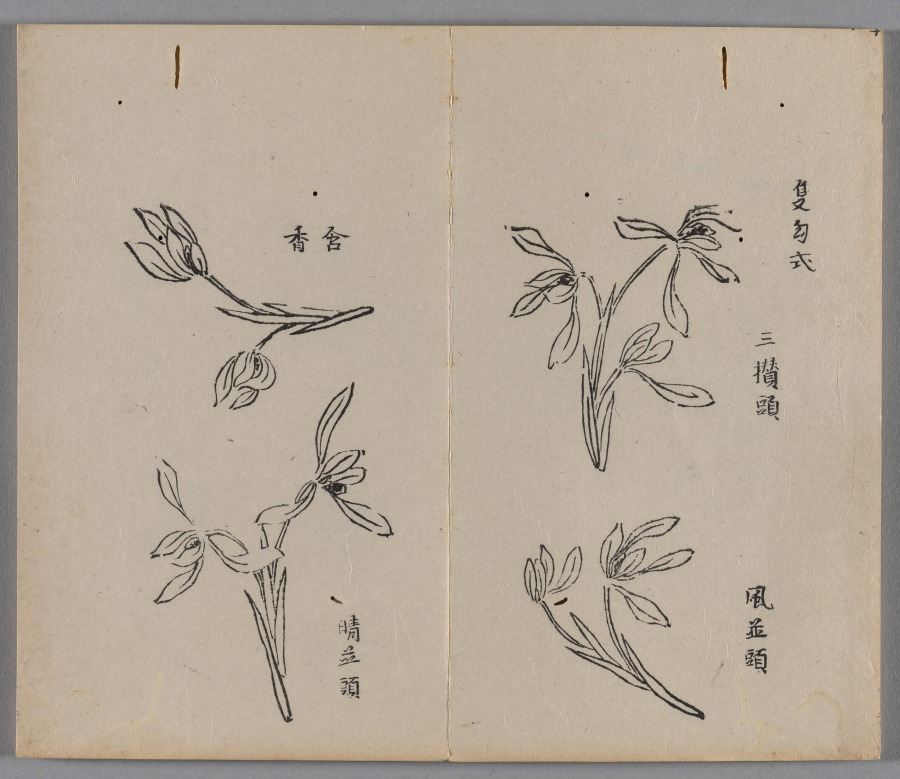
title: Ten Bamboo Studio Painting and Calligraphy Handbook (Shizhuzhai shuhua pu): Orchids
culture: China, Qing dynasty (1644-1911)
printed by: Hu Zhengyan (Chinese, c. 1584–1674)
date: 1633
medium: Woodblock-printed book; ink and colors on paper; first edition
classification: Print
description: Color printing reached a level of perfection in the early 1600s, as seen in this Ten Bamboo Studio Collection of Calligraphy and Painting and the Mustard Seed Garden Manual of Painting (printed 1679 and 1701). The painterly quality, precision in registering (aligning) the woodblocks, and harmonious colors made them the most successful color print editions in Chinese history. Both editions were printed and compiled in Nanjing, spread nationwide, and had a great impact on the arts in Japan and Korea.